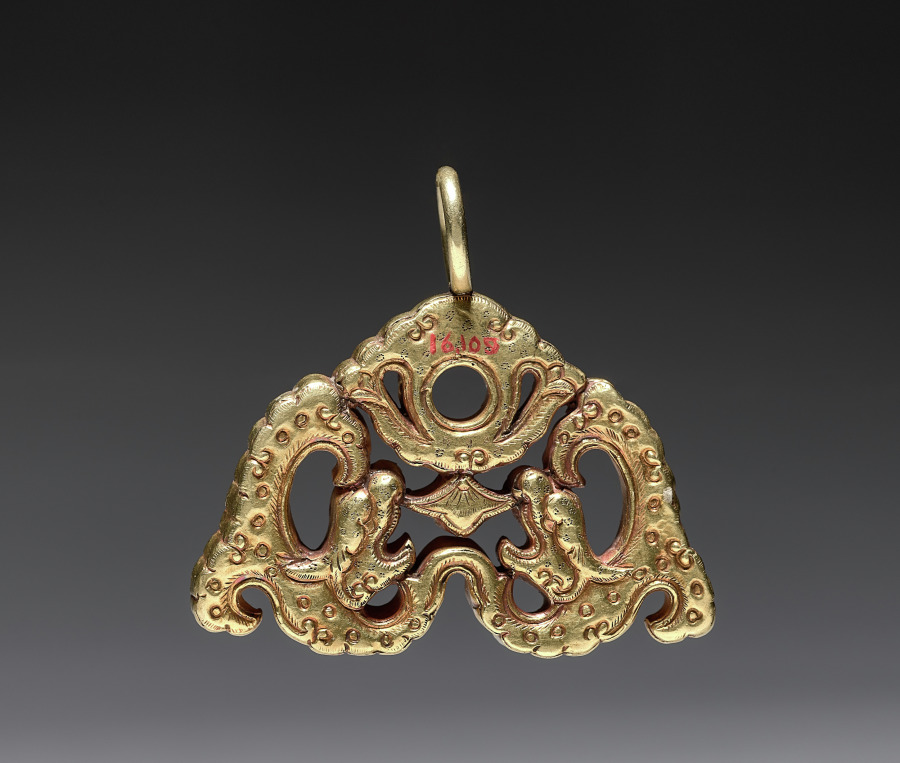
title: Pendant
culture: Siam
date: 1800s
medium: gold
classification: Jewelry